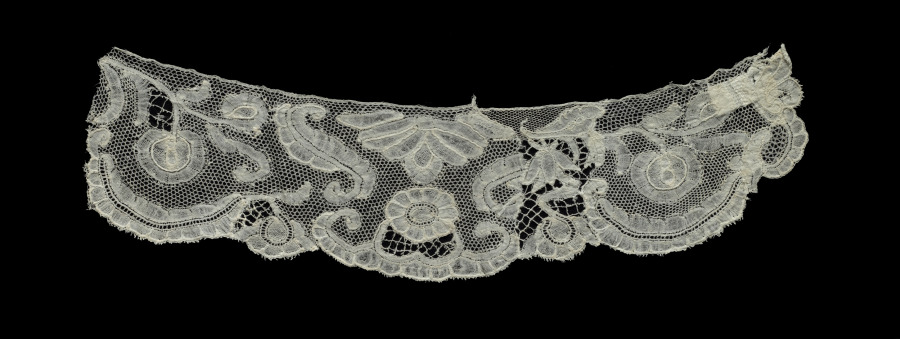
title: Lace Edging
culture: Belgium, Brussels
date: 1700s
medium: Linen: bobbin lace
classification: Lace